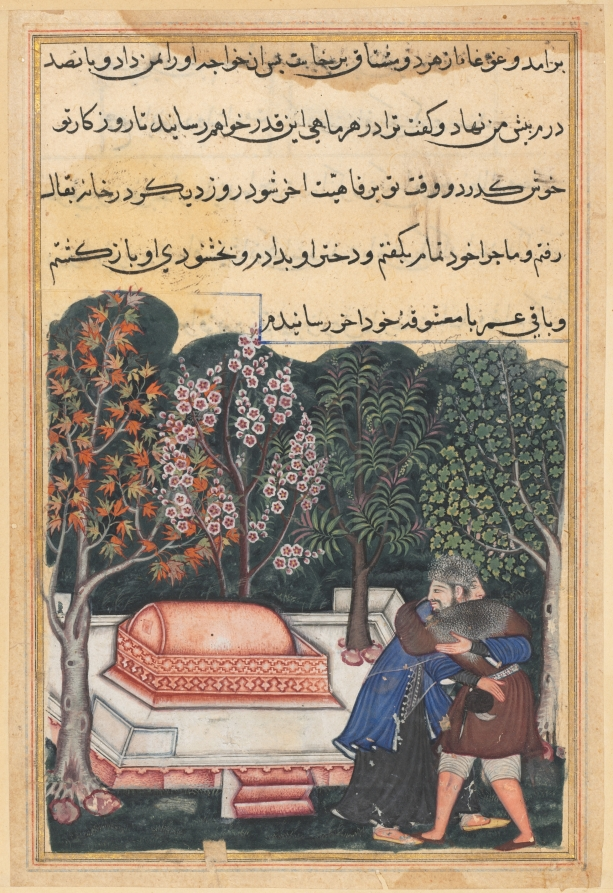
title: The young man of Baghdad reunited with his slave-girl, from a Tuti-nama (Tales of a Parrot): Forty-eighth Night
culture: Mughal India, court of Akbar (reigned 1556–1605)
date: c. 1560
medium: gum tempera, ink, and gold on paper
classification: Painting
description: After the young man was left behind by his merchant ship, his lover, the slave girl, believed that he was dead. She erected a monument in his honor and donned black clothes of mourning, yet fate brought them together again. Here, the two lovers embrace in front of the young man’s empty grave.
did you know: The space designated for the sky has not been painted.